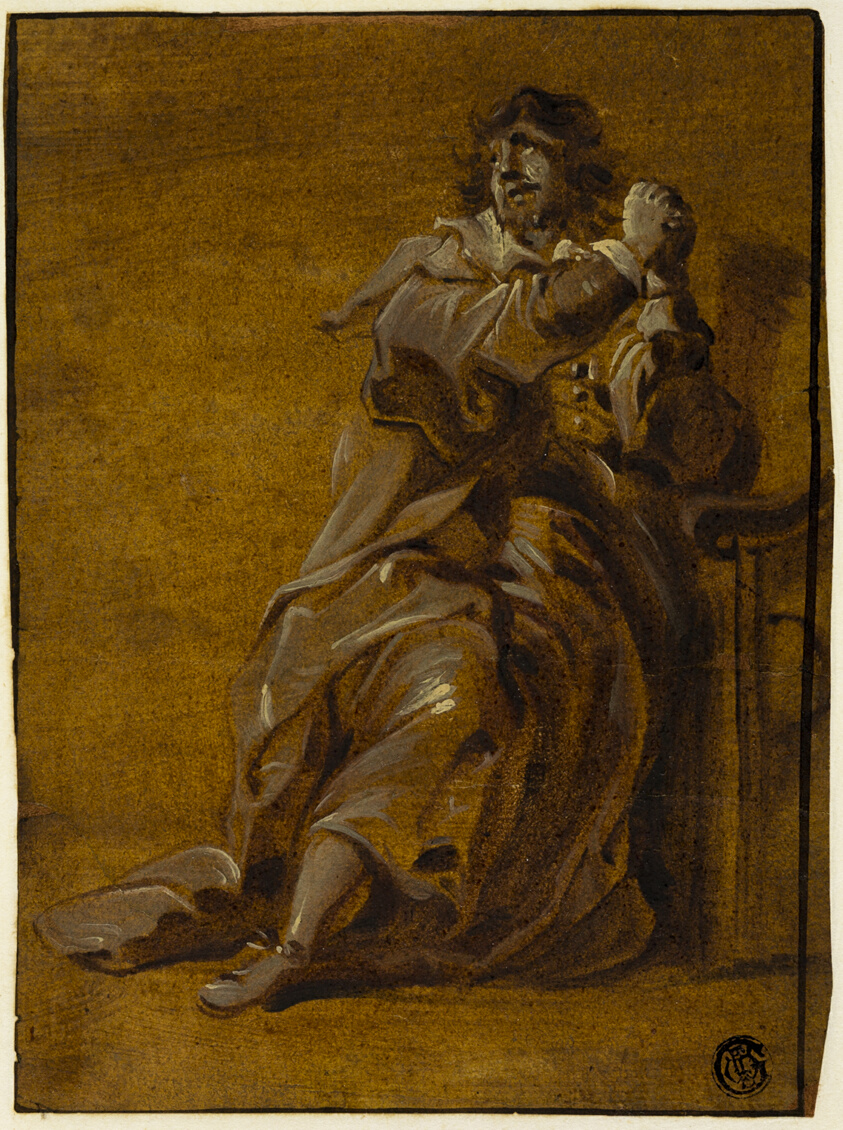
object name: Drawing and Watercolor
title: Man with Hands Clasped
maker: Style of Thomas Willeboirts (Flemish, 1614-1654); or Style of Jacques Callot (French, 1592-1635)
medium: Oil paint, on laid paper, laid down on Japanese paper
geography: Flanders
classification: pen and ink drawings; drawings (visual works); prints and drawing